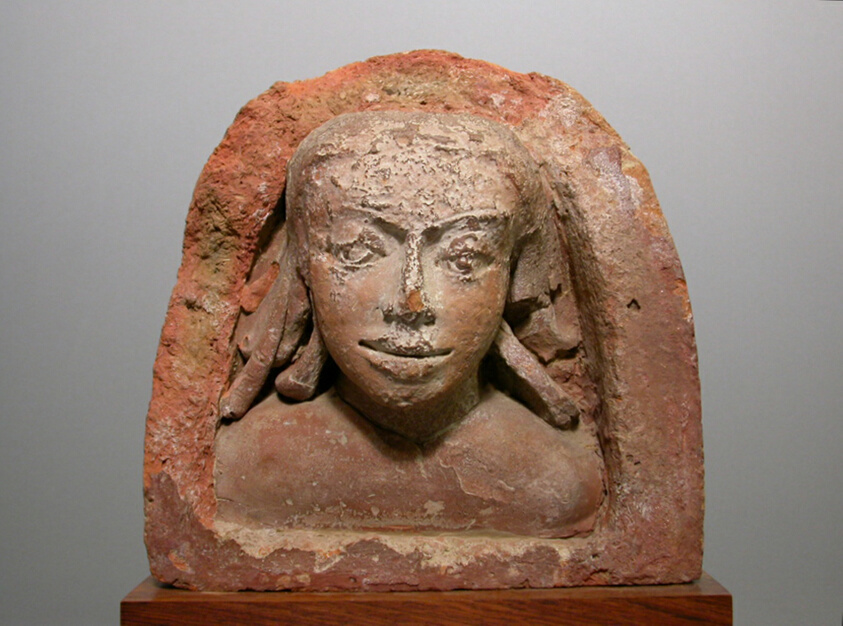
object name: Sculpture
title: Male Bust with Rolling Curls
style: South Asian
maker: India; Uttar Pradesh, possibly Ahichhattra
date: Gupta period, 4th/5th century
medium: Terracotta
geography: Uttar Pradesh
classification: earthenware; ceramics; sculpture; asian art